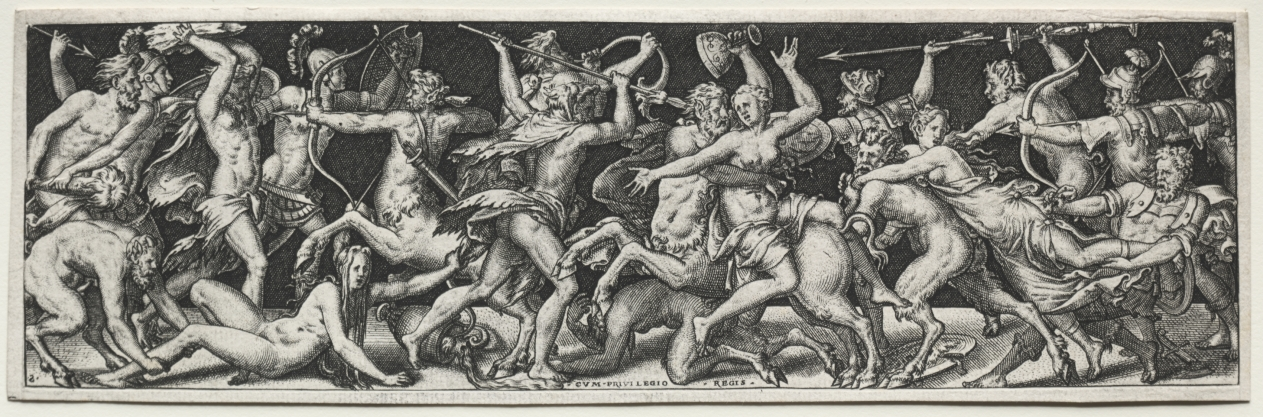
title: Combats and Triumphs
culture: France, 16th century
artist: Etienne Delaune (French, 1518/19-c. 1583)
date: c. 1550–72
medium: engraving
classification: Print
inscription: lower right, in plate: ·S·[backwards] ; lower center, in plate: ·CVM·PRIVILEGIO · REGIS ·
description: Etienne Delaune (French, 1518/19-1583) Combats and Triumphs, probably 1560s Engravings Gift of Leonard C. Hanna 1924.671-.674 The Triumph of Bacchus Battle of Men and Animals Combat of the Naked Men Battle of the Centaurs and the Lapiths The four prints shown here come from a series of twelve known as the Combats and Triumphs. The friezelike composition reflects the artist's study of marble relief carvings on Greek and Roman sarcophagi (coffins), here reduced to a preciously small setting. Against a flat, stagelike background, Delaune's balletic warriors engage in a Mannerist version of artificial war. Etienne Delaune was inspired by the art created at Fontainebleau, but he worked in Paris and then Strasbourg during the late 1500s. His small, exquisitely executed engravings reflect his training as a goldsmith and his work as a medallist.